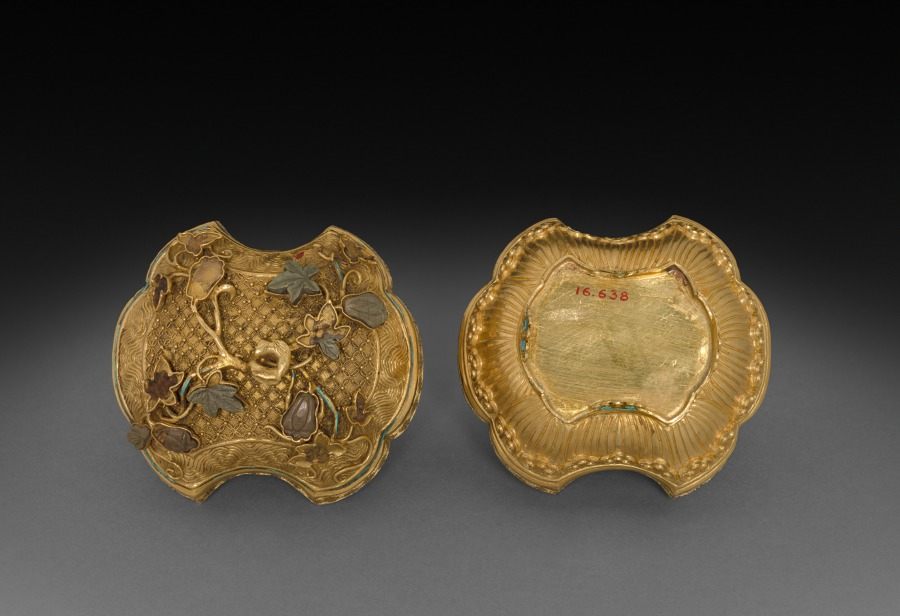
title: Box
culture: China, Qing dynasty (1644–1911)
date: 1800s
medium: silver gilt with kingfisher feather inlay and semi-precious stones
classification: Metalwork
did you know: The box is embellished with blue king-fisher feather inlays.